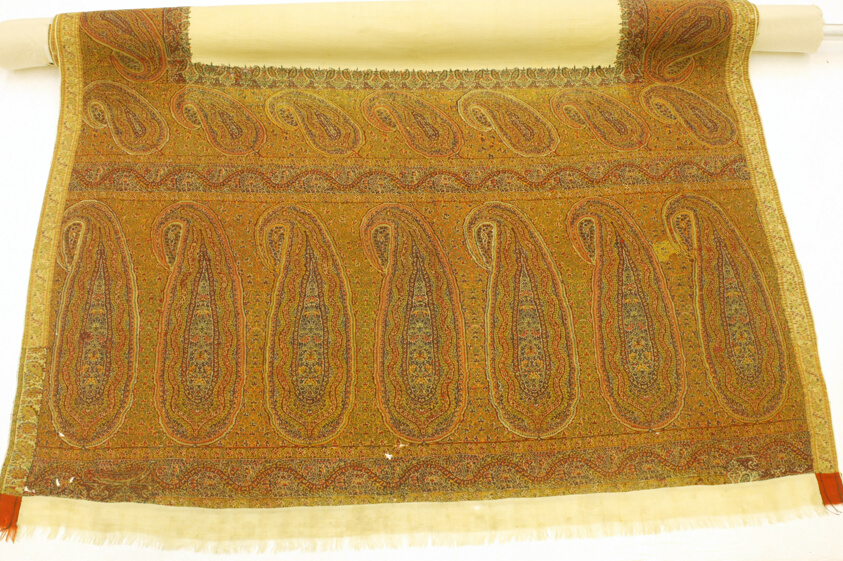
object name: Costume and Accessories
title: Shawl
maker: India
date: 19th century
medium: Cashmere wool, twill tapestry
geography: India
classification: textile; costume; dress (garment); clothing